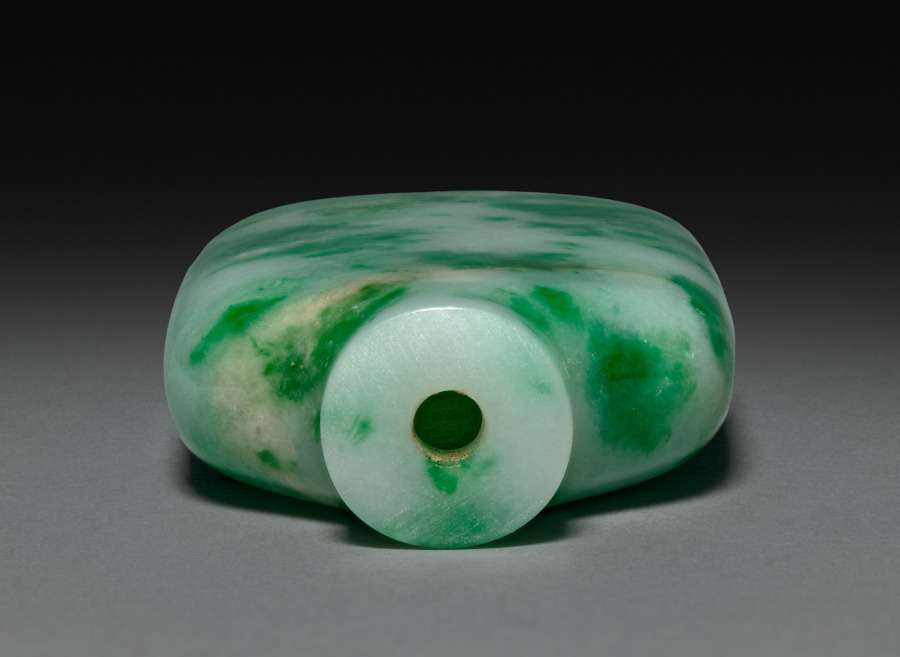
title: Snuff Bottle with Stopper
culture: China, Qing dynasty (1644-1911)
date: 1800s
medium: jade and rose quartz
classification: Jade